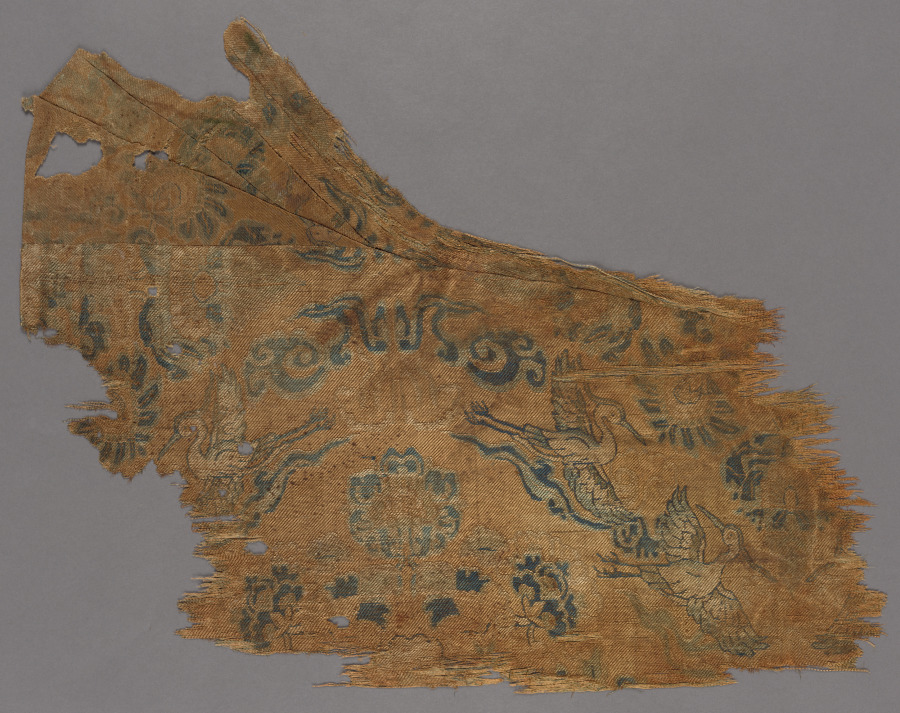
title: Fragment from a Garment (smaller fragment, outer layer)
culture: China, Liao dynasty (907-1125), 10th century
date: 900s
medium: weft-faced compound twill, silk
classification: Textile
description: This textile preserves part of an overall design of large, radiating floral motifs arranged in staggered, horizontal rows. In the spaces between are pairs of flying cranes and cloud scrolls that are common motifs in Liao paintings and decorative arts. The loose structure of the pattern and the naturalism of the motifs represent the final evolution of a pattern that had originated in the Tang dynasty (AD 618–907).